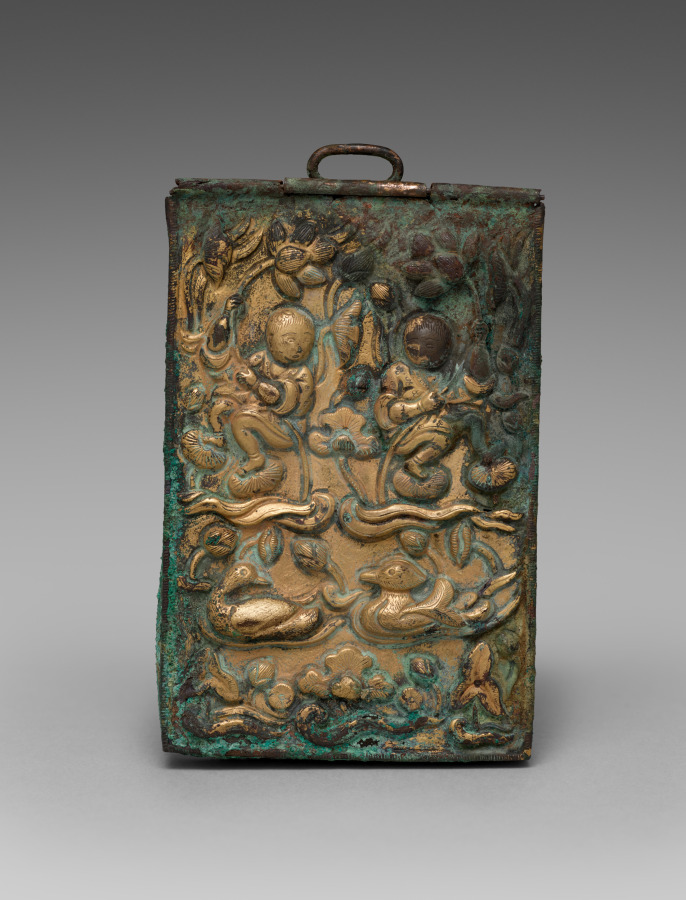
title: Sutra Container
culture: Korea, Goryeo dynasty (918–1392)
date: 1100s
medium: gilt bronze with incised and high relief decoration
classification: Metalwork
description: This is a portable container once used to preserve a miniature Buddhist sacred text. Created by hammering the reverse, high-relief designs on both the front and back of the case depict a peaceful pond where young boys are holding giant lotus flowers in their hands, and a pair of mandarin ducks are swimming. Probably the playful boys represent newly reborn souls in the Pure Land.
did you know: This is a portable container once used to preserve a miniature Buddhist sacred text, particularly useful for traveling Buddhist pilgrims.